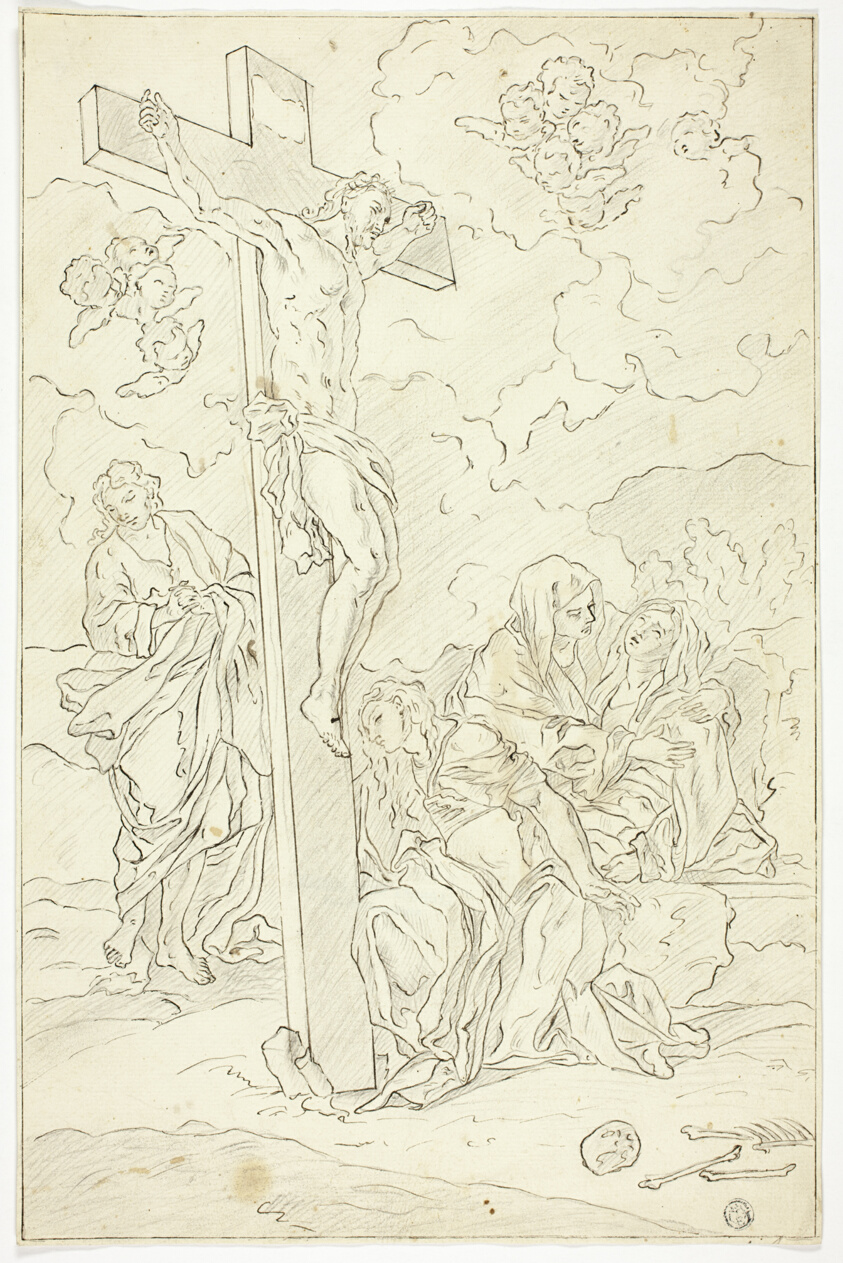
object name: Drawing and Watercolor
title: Crucifixion with Saint John the Evangelist, the Virgin and Two Maries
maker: School of Francesco Solimena (Italian, 1657-1747)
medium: Pen and brown ink, over black chalk, on ivory laid paper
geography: Italy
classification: pen and ink drawings; drawings (visual works); prints and drawing